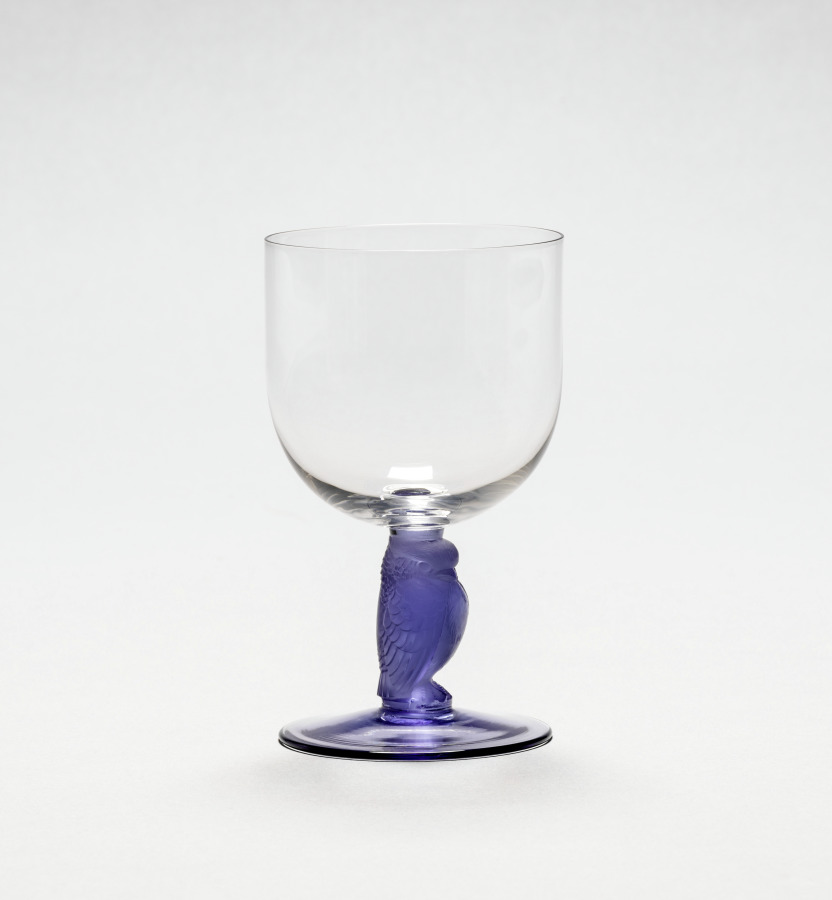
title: Raptor Goblet (Verre rapace)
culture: France, 20th century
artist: René Lalique (French, 1860–1945)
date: c. 1929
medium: Cast and blown glass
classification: Glass